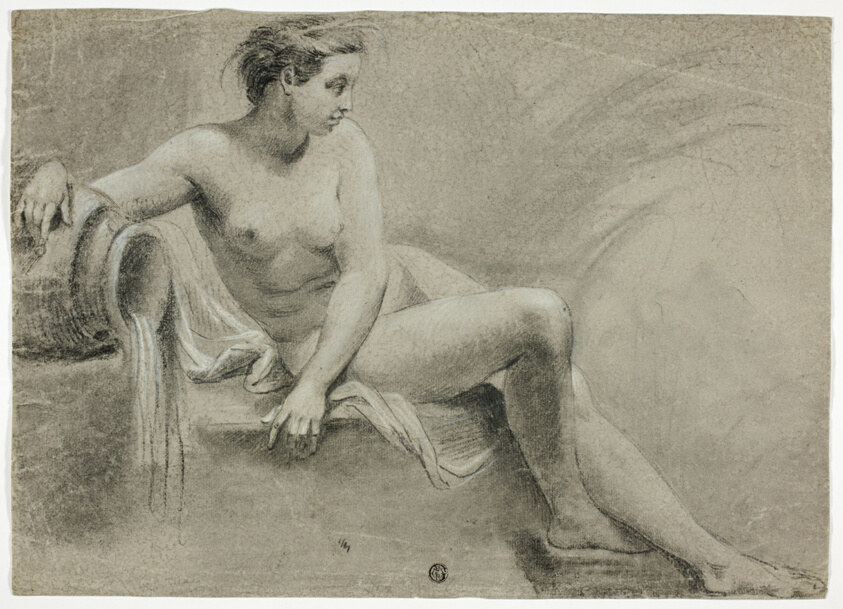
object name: Drawing and Watercolor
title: River Nymph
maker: Style of Carlo Cignani (Italian, 1628-1719)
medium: Black chalk, heightened with white chalk, on prepared brown-gray ground, on blue laid paper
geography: Italy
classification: charcoal; drawings (visual works); prints and drawing